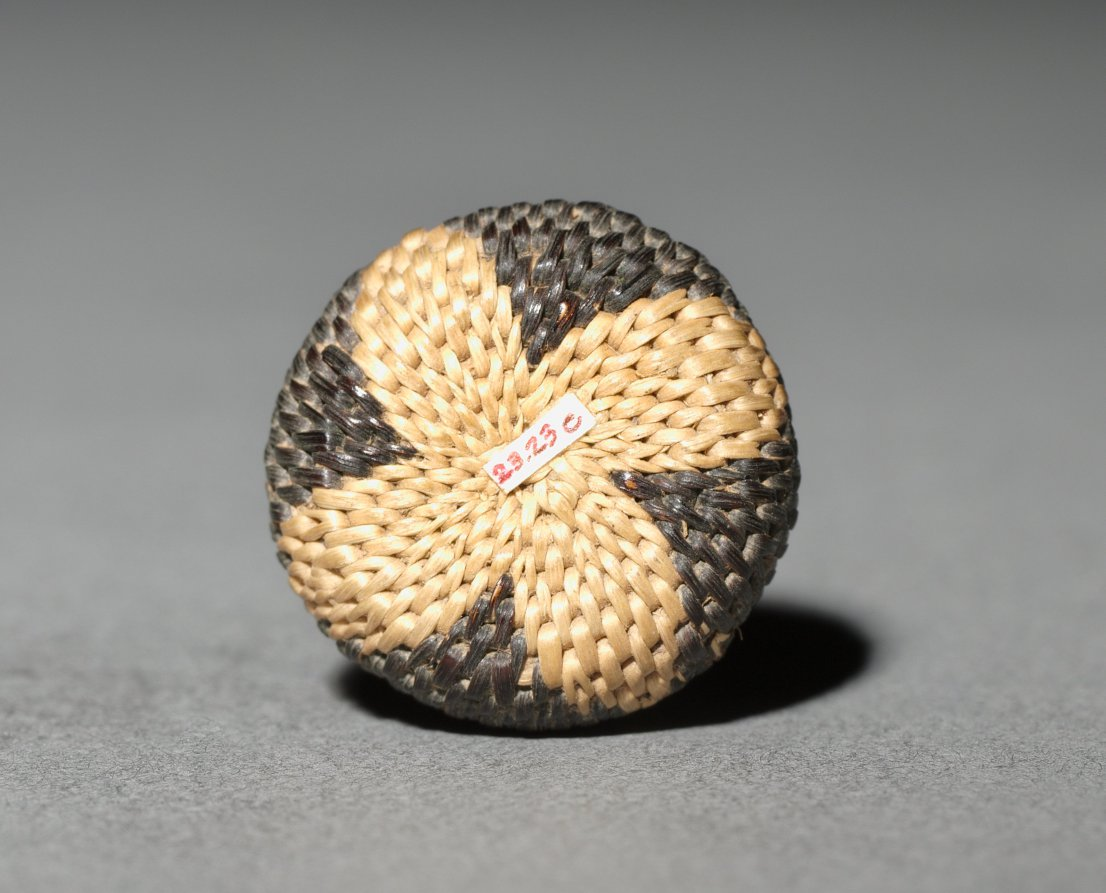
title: Miniature Basket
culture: America, Native North American, Southwest, Arizona, Akimel O'odham (Pima), Unassigned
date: before 1923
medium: plant fiber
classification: Basketry